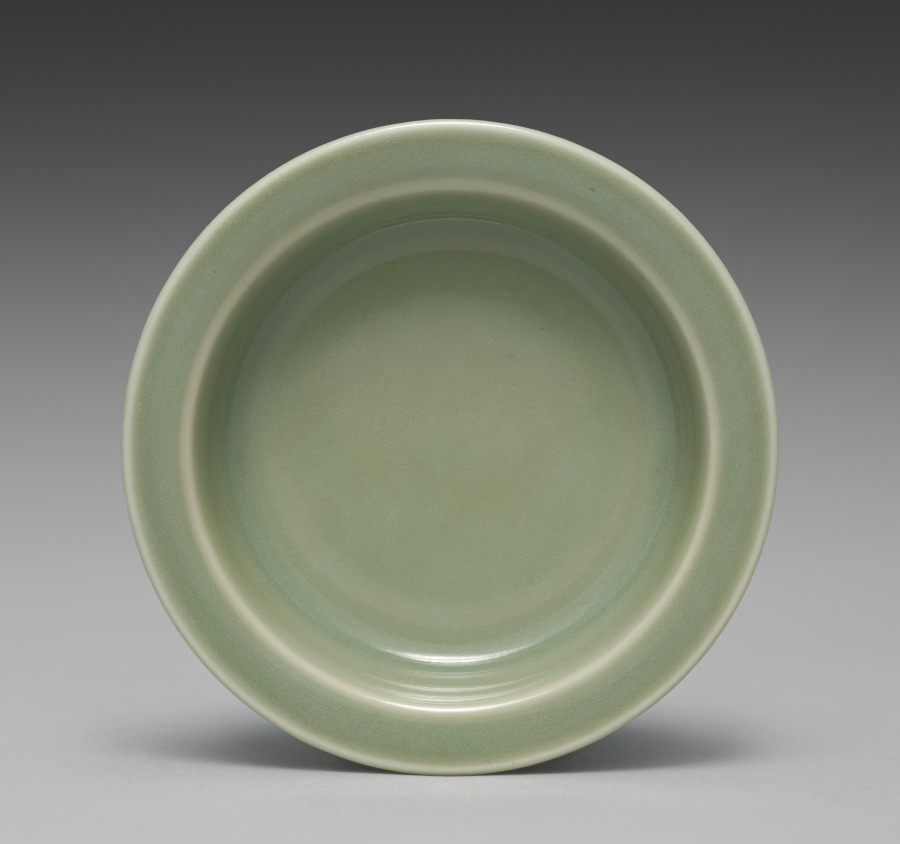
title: Saucer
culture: Japan, Meiji period (1868–1912)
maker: Seifū Yohei III (Japanese, 1851–1914)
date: 1893–1914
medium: One from a set of ten dishes; porcelain with green glaze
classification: Ceramic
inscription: 清風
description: Yohei III’s main output for his sophisticated clientele was in the form of tea sets and dining sets. He created a range of dishes in green glazes. He often produced in pairs, sets of five, or sets of ten. For this set of ten small dishes in a simple, round form that emphasizes the glaze above all, the box lid designates the piece as seiji, or green-glazed porcelain, using a general term for the extensive palette of green glazes often called celadon in English. The box lid further identifies the dishes themselves as tōchō, literally “bean-sized saucers,” a size that makes them suitable for dipping sauces.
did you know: The ten dishes in this set are stored in stacks of five in a two-compartment box.